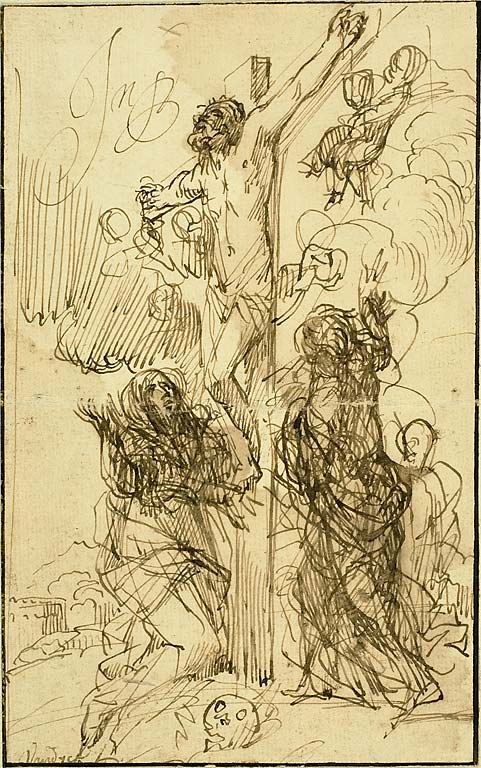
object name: Drawing and Watercolor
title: The Crucifixion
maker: Attributed to Jan Philipsz. van Bouckhorst (Dutch, 1588-1631); or Anthonie van Dyck (Flemish, 1599-1641) or his school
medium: Pen and brown ink on cream laid paper, laid down on board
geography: Netherlands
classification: pen and ink drawings; drawings (visual works); prints and drawing